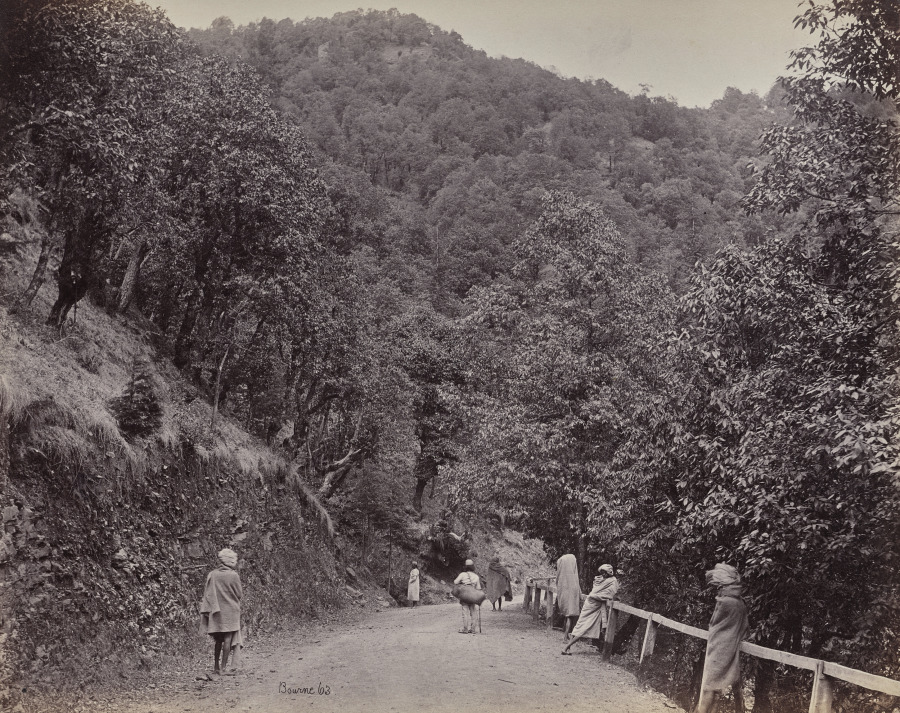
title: Shimla. The Mall or Principal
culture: England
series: Photographs of Northern India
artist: Samuel Bourne (British, 1834–1912)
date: 1863–70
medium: albumen print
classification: Photograph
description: The 50 images in this album, all taken in the 1860s, move from the hill towns of the Himalayas down to cities including Lahore (now in Pakistan), Delhi, Lucknow, Agra, Benares (now Varansi), and Calcutta (now Kolkata). Architectural studies of major monuments offer valuable historical records of what sites such as the Taj Mahal and the imperial mosque of the Mughal emperors in Delhi looked like before 20th-century restorations.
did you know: Samuel Bourne, the author of most the images in this album, was a banker in England before he moved to India to become a professional photographer.